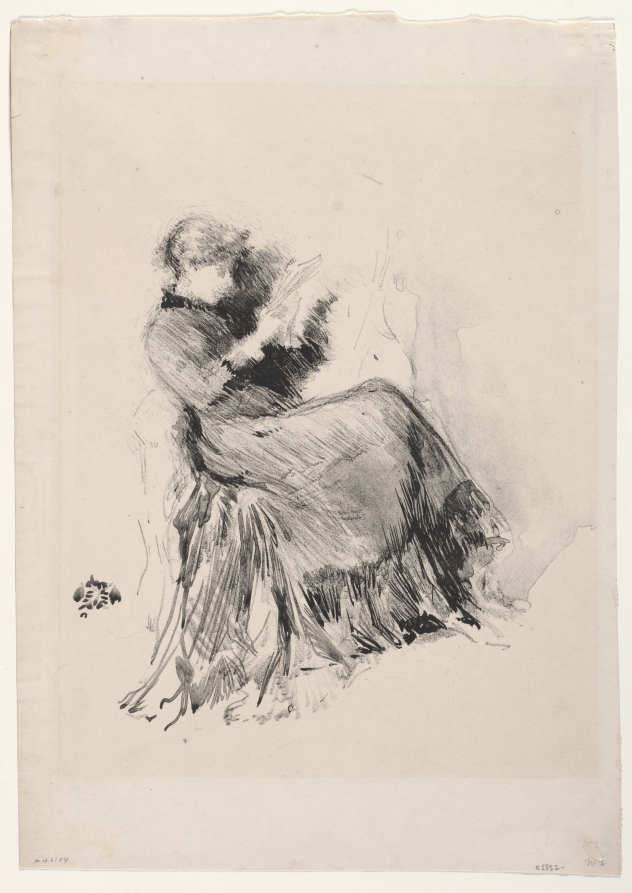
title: Study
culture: America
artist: James McNeill Whistler (American, 1834–1903)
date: 1878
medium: lithograph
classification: Print